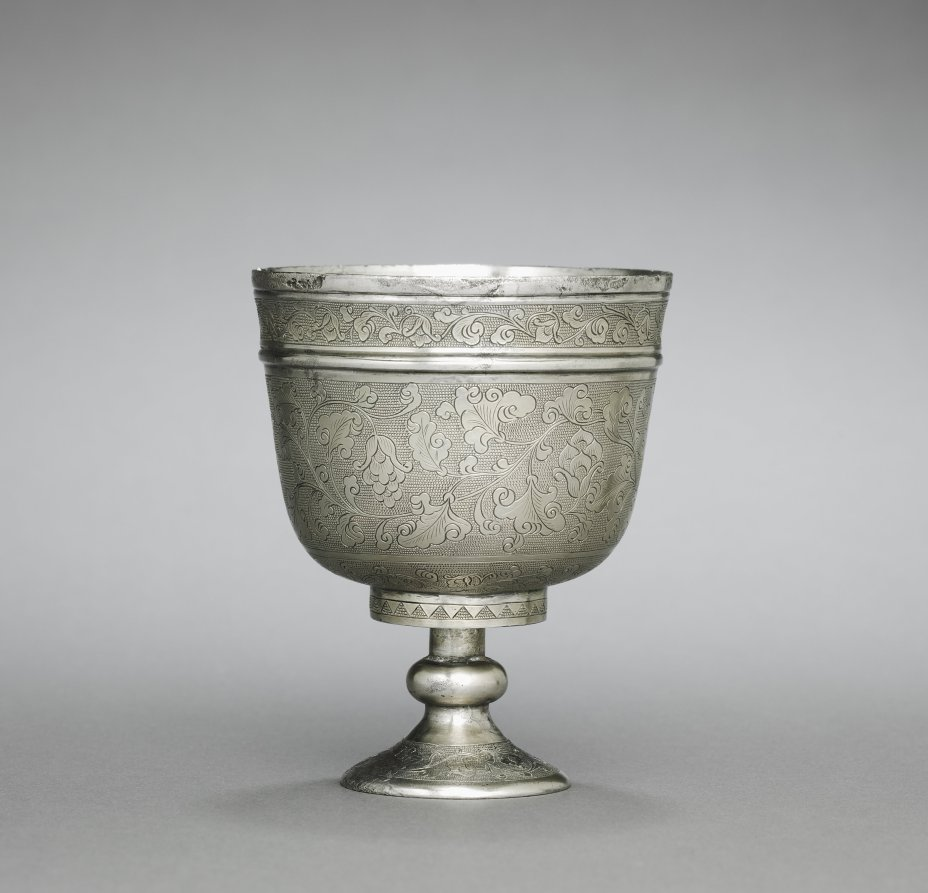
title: Stem Cup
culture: China, Tang dynasty (618-907)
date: early 700s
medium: silver with gilt interior and incised and chased decoration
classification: Silver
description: This stem cup is a supreme example of secular silver. During the Tang Dynasty (618–907), vessels like this were used to serve both tea and wine, the beverages enjoyed by the elite. It also demonstrates the effects of east-west exchanges along the Silk Road: the stem cup was a popular shape in Sasanian Iran.